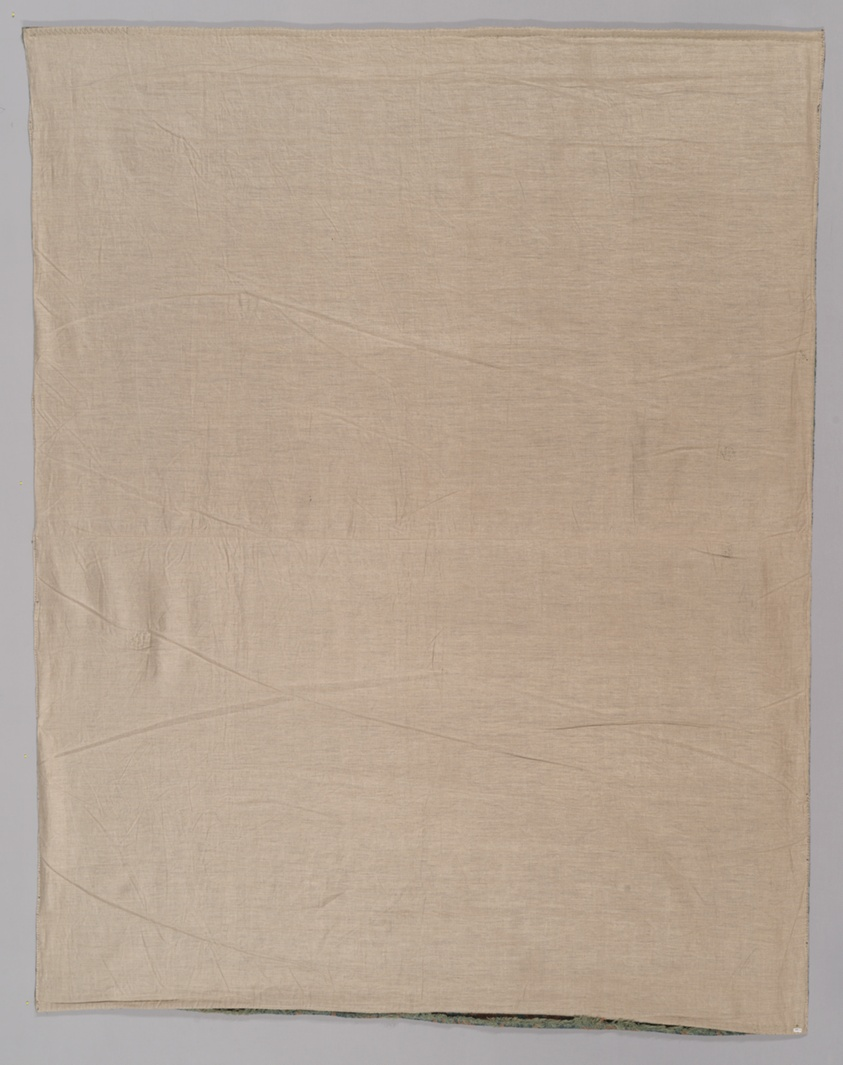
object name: Textile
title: Peacock and Dragon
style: Arts and Crafts Movement, british, 19th century, 20th Century, British Arts and Crafts Movement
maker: Designed by William Morris (English, 1834–1896); Produced by Morris & Co., London (English, 1875–1940); Queens Square, London, or Merton Abbey, London (English, 1881–1940)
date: Design 1878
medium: Wool, three-colored complementary weft, weft-float faced 3:1 twill weave; lined with linen, plain weave; two panels pieced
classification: textile; weaving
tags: peacocks, animals, birds, dragon